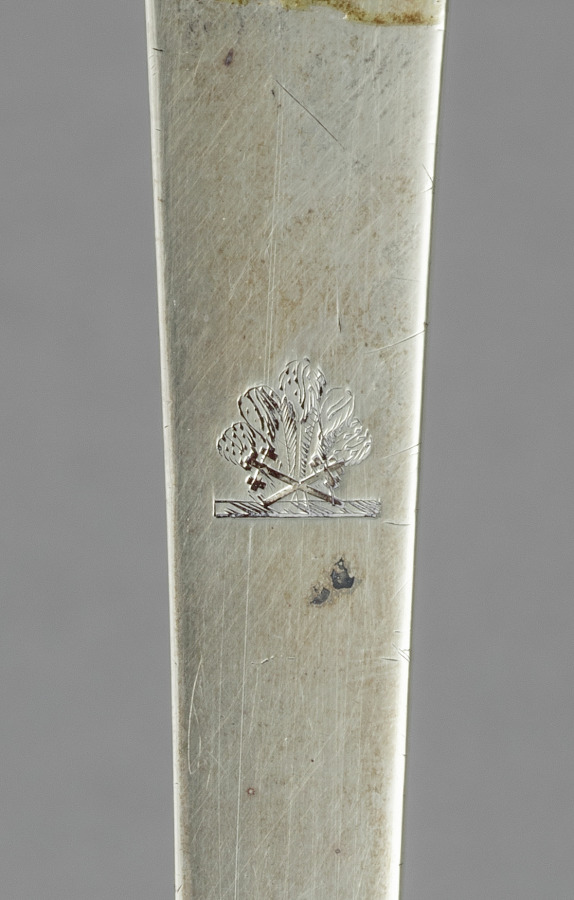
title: Skewer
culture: England, 18th century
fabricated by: Hester Bateman (British, 1709–1794)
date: 1783–1784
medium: silver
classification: Silver